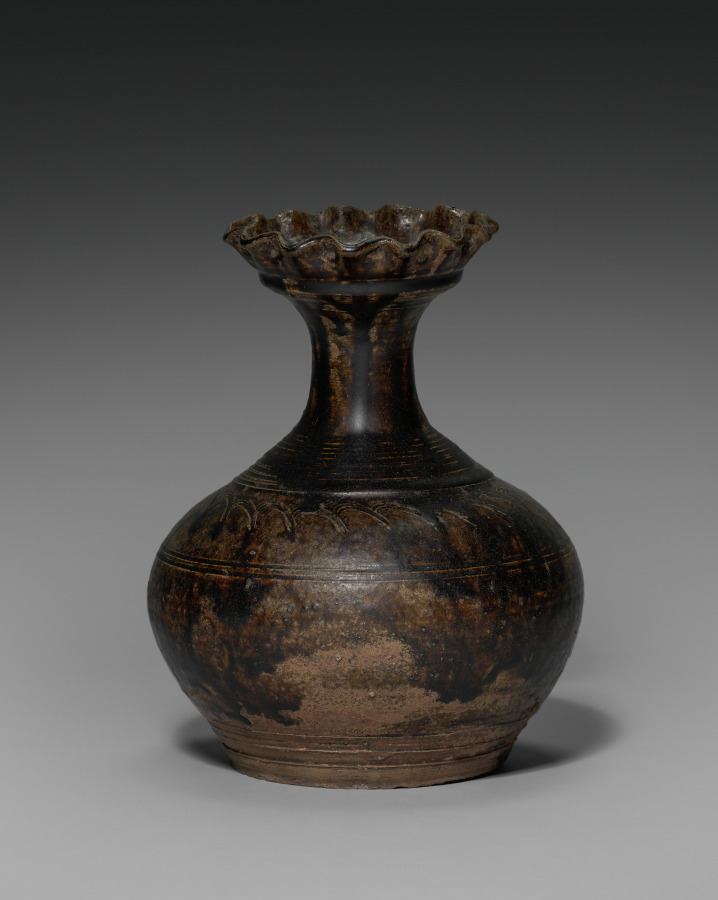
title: Khmer Vase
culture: Cambodia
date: 1100s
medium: earthenware with dark brown glaze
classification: Ceramic